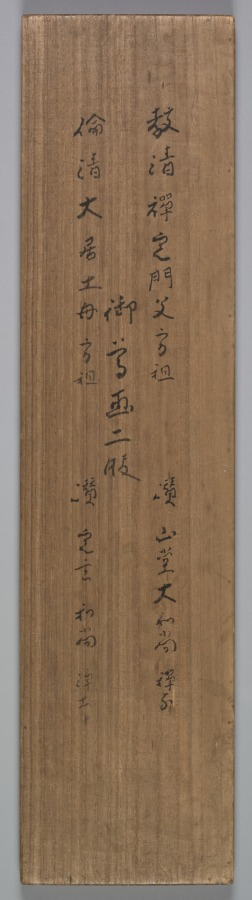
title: Pair of Portraits of Samurai-Officials: Hirai Kyosei and Hirai Rinsei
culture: Japan, Edo period (1615–1868)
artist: Sando Hyosho (Japanese)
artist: Tsukioka Settei (Japanese, 1710–1786)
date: 1776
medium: hanging scrolls; ink and color on silk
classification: Painting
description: In this pair of figure paintings, the artist provided generational portraits of two clan leaders from the Hirai family, accompanied by lengthy inscriptions in a distinctive calligraphic style from separate scholar-officials.